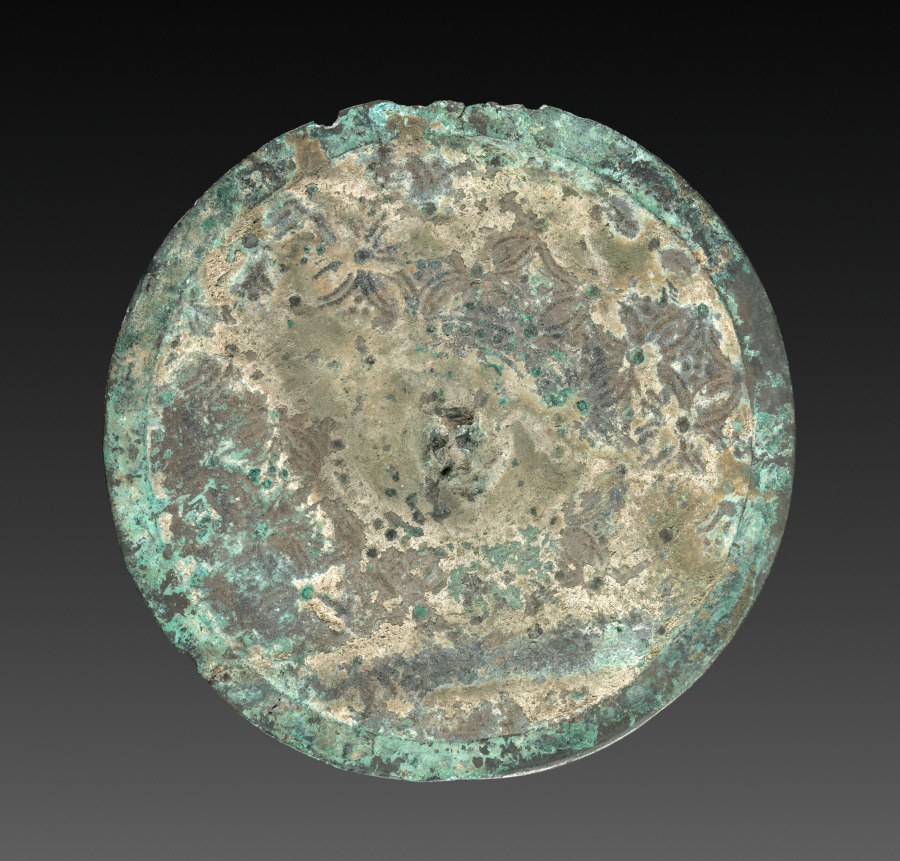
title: Mirror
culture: Japan, Kamakura period (1185–1333)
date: 1185–1333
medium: silvery bronze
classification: Metalwork